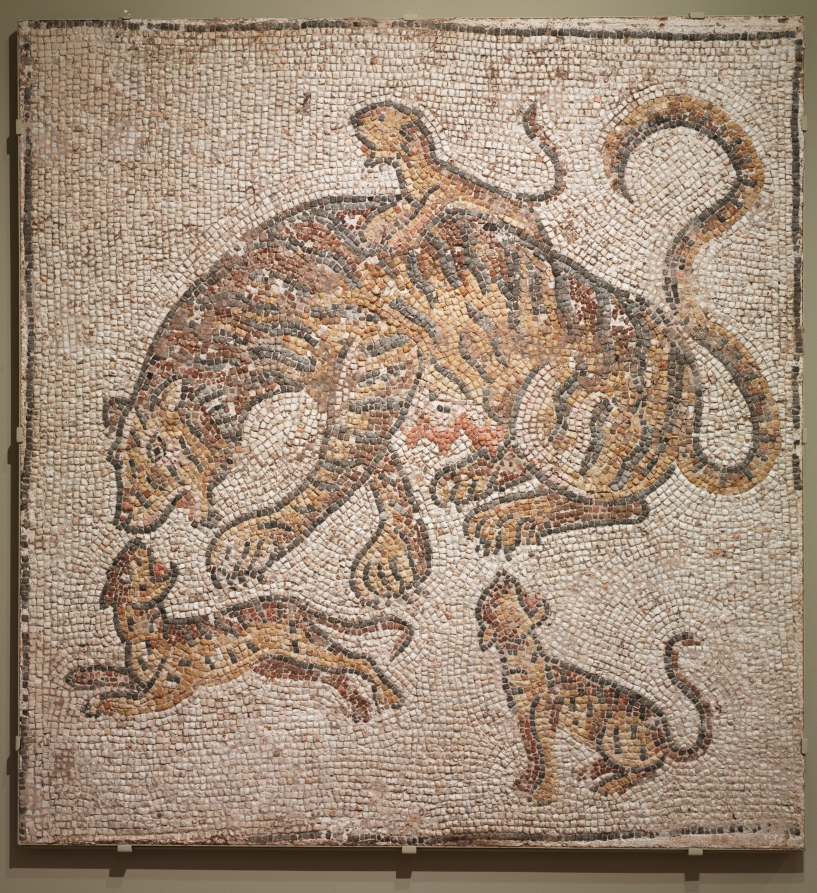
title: Mosaic of Tigress and Cubs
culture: Eastern Roman Empire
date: 300s CE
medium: tesserae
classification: Mosaic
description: Despite its rectangular shape and creation from mostly square tesserae, this mosaic incorporates many curves in its composition, particularly for the tails of the tigers. With one cub on her back and two before her, the mother tiger reaches out with one paw and an open mouth, whether to scold or to play. Unlike lions, leopards, and bears, tigers appear relatively rarely in Roman art, with the tigress seen more frequently than her male counterpart.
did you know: This mosaic includes over ten thousand tesserae, or small cut-stone tiles.